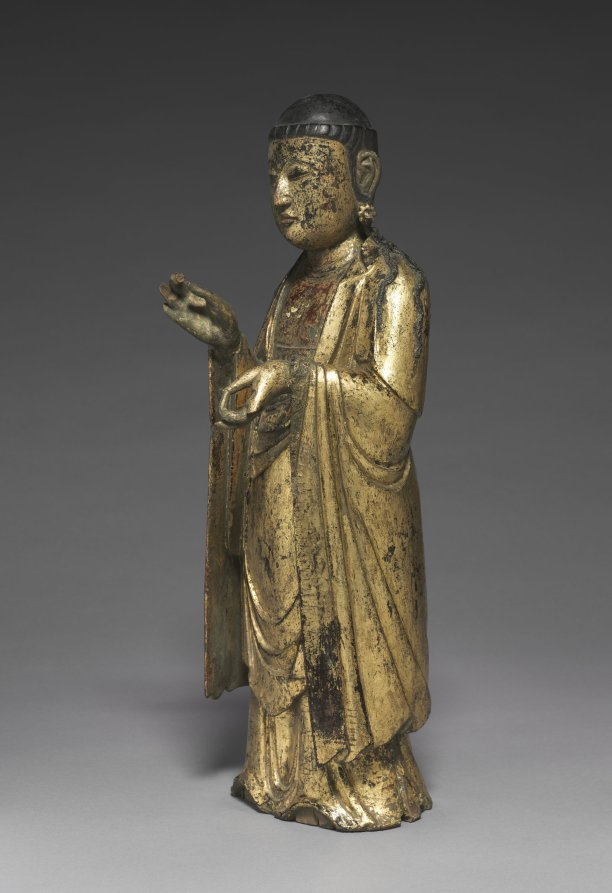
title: Standing Bodhisattva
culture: Korea, Joseon dynasty (1392–1910)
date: 1500s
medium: wood with lacquer and gold, and metal earrings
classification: Sculpture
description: This work demonstrates the enduring presence of Buddhism and its religious practice during the Joseon dynasty (1392–1910) even after Neo-Confucianism, a revised form of Confucianism that emphasized self-cultivation as a path to the formation of a harmonious society and state, became the state religion. Because of its missing crown, it is hard to identify what Buddhist deity this statue represents. But there is no doubt it still can be attributed to a bodhisattva (meaning “enlightened being”) for its iconographic attributes: elaborate jewelry and a lock of long hair.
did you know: This Buddhist statue is missing its crown, which makes it hard to identify what deity it represents.